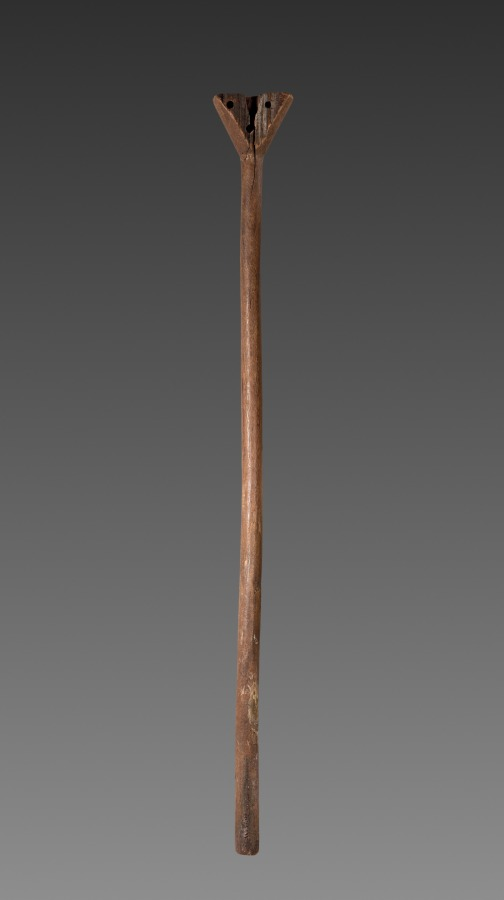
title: Wooden Staff or Support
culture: Egypt, Middle Kingdom (2040–1648 BCE), Dynasties 11–12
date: 2030–1650 BCE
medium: wood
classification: Wood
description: This staff has a terminal in the shape of papyrus umbel serving as a support for some other detail now missing.